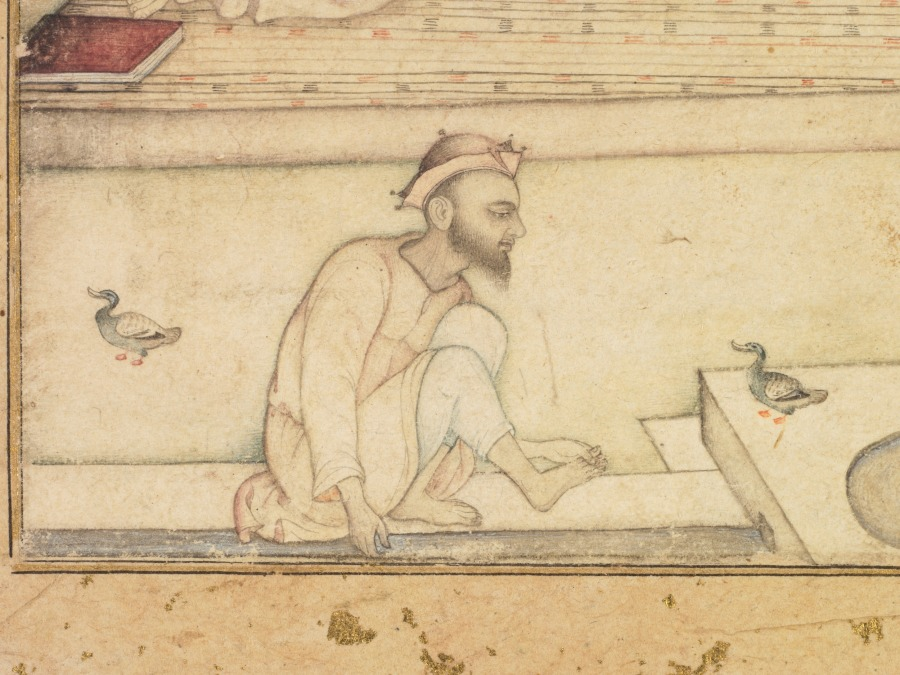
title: Kabir and Two Followers on a Terrace (recto)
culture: India, Mughal, 17th century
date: c. 1610–1620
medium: Gum tempera, ink, and gold on paper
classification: Painting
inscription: verso: four lines of nast 'aliq calligraphy with illuminated panels, with illuminated panels, ink gold and opaque watercolor on paper